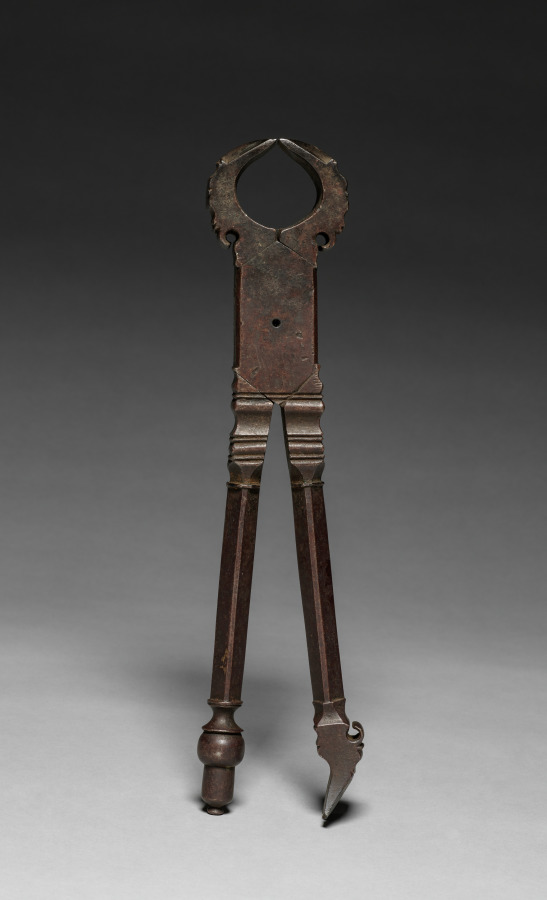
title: Pinchers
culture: Germany or France, 16th century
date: 1500s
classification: Tool